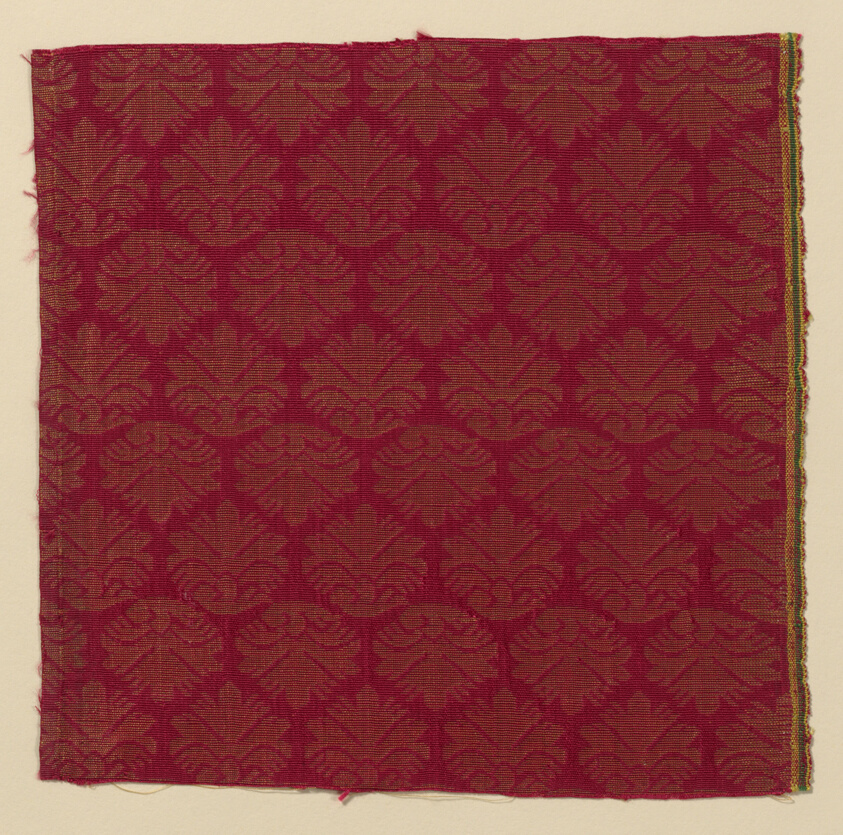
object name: Textile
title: Fragment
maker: Italy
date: 1625/75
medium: Plain compound cloth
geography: Italy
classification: textile; weaving